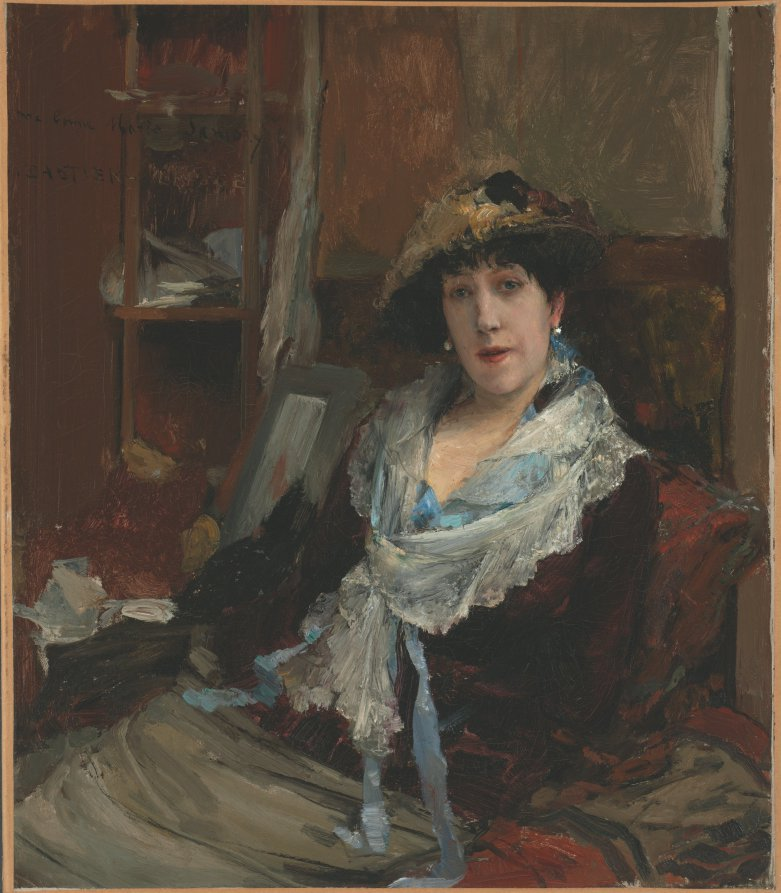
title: Marie Samary of the Odéon Theater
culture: France, 19th century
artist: Jules Bastien-Lepage (French, 1848–1884)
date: c. 1881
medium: oil on canvas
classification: Painting